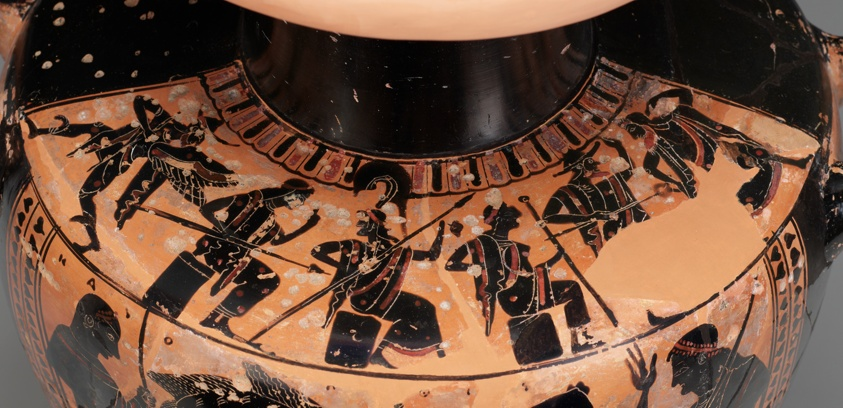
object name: Vessel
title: Hydria (Water Jar)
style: archaic (greek), attic, black-figure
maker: Attributed to a painter of the Leagros group; Greek; Athens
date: about 515-500 BCE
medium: terracotta, black-figure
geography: Athens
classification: vessel; earthenware; ceramics; ancient art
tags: mythological figures, drinking, Heracles, Aphrodite